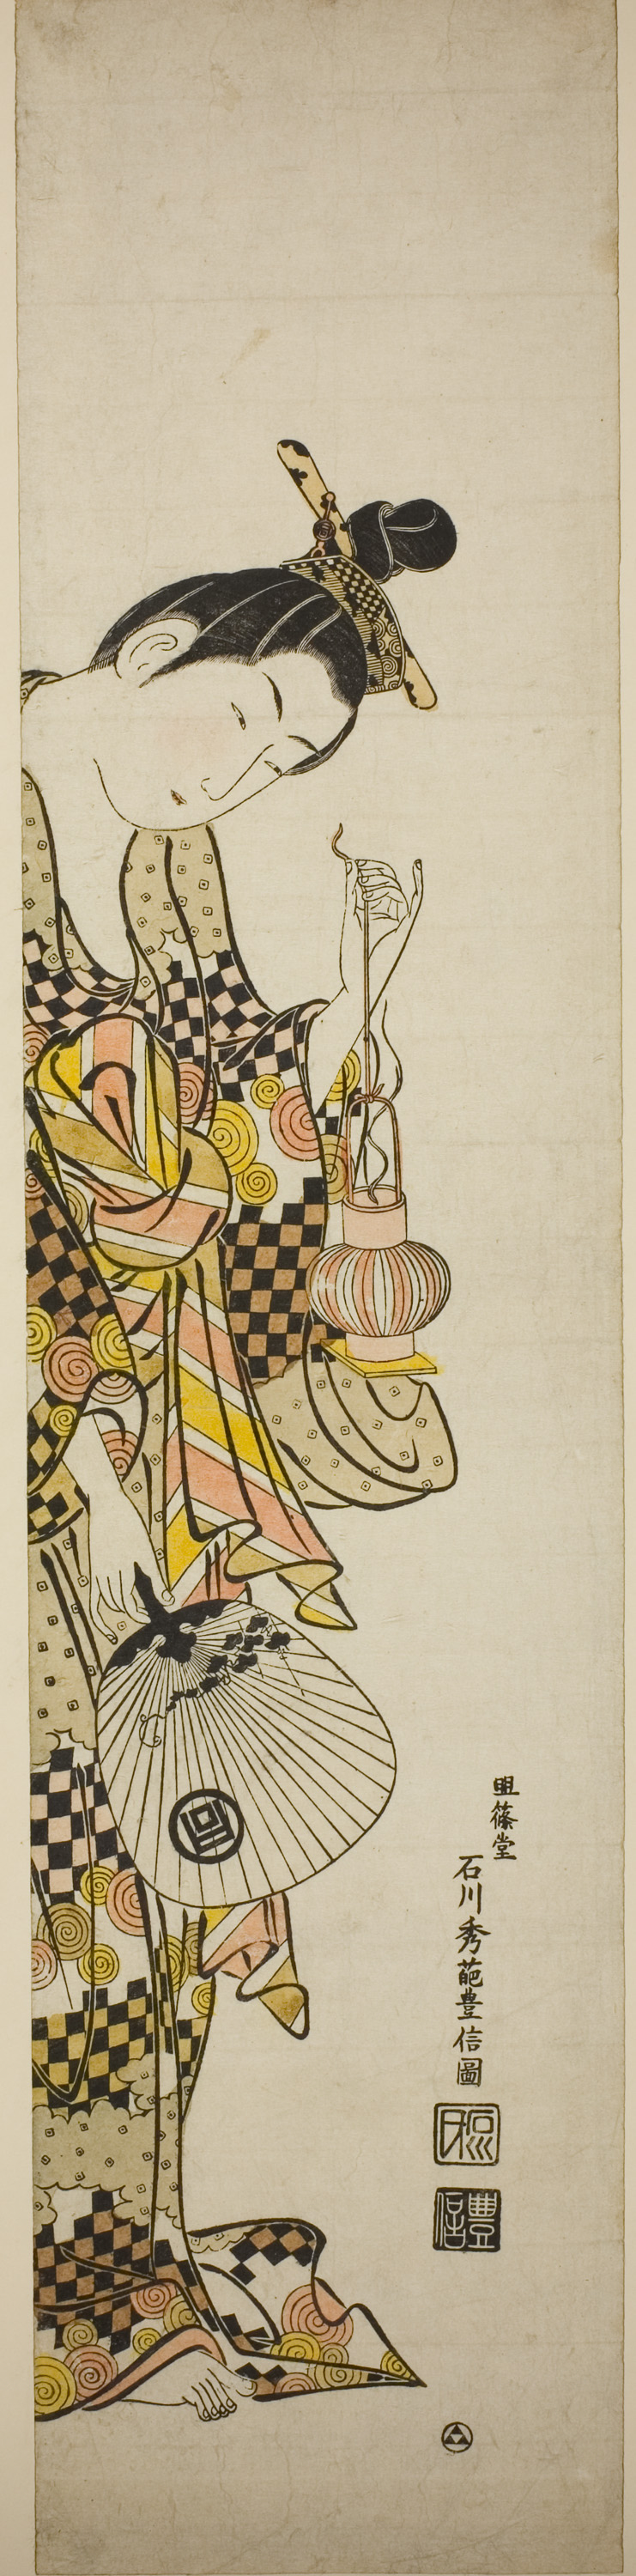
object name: Print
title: A Courtesan Holding a Lantern and a Fan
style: Japanese (culture or style)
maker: Ishikawa Toyonobu (Japanese, 1711-1785)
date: c. 1745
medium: Hand-colored woodblock print; wide hashira-e, urushi-e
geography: Japan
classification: woodblock print; print; asian art